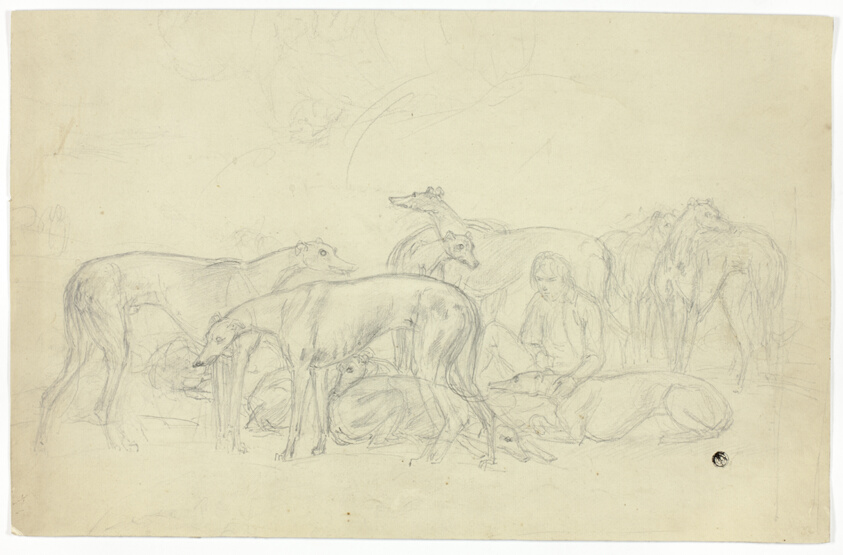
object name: Drawing and Watercolor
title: Greyhounds and Their Keeper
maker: Sawrey Gilpin (English, 1733-1807); or James Ward (English, 1769-1859)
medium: Graphite on cream laid paper, laid down on ivory card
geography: England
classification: graphite; paper; drawings (visual works); prints and drawing